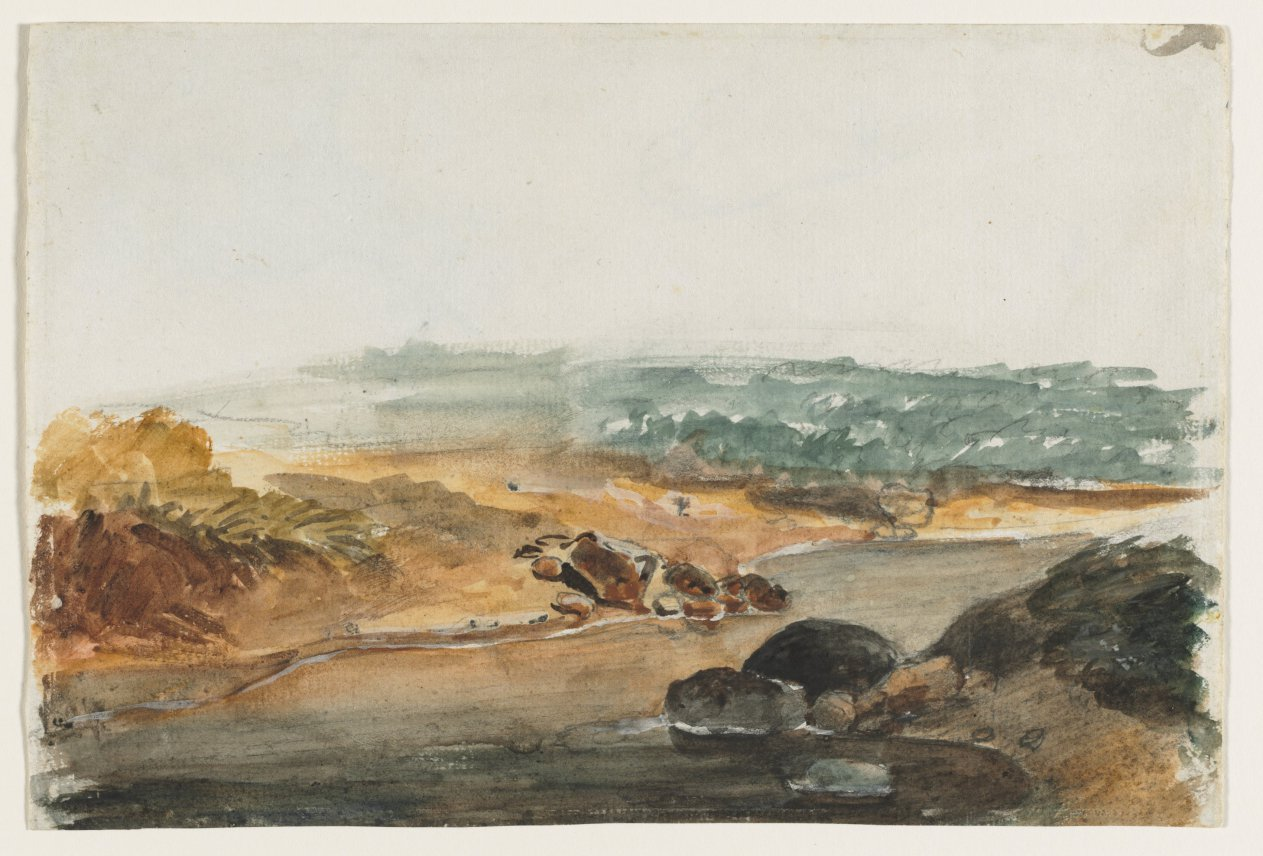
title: Landscape (recto)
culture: France, 19th century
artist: Antoine-Louis Barye (French, 1796–1875)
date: c. 1823–75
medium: watercolor with gouache, and graphite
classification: Drawing